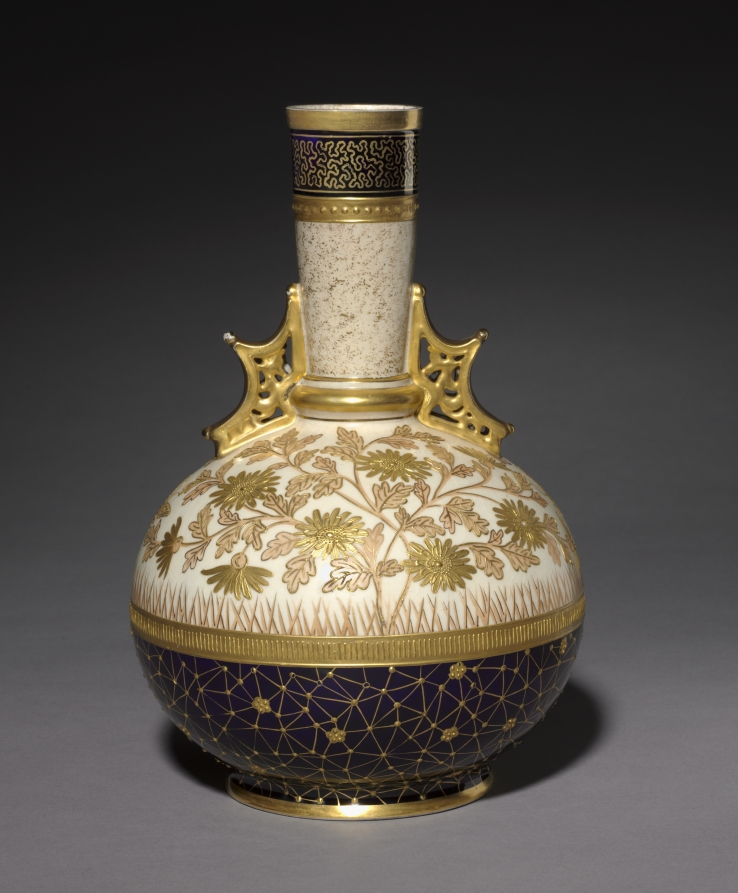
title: Vase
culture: America, New York, Brooklyn, 19th century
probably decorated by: Edward Lycett (American, 1833–1910)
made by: Faience Manufacturing Company (American)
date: c. 1884–1887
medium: earthenware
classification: Ceramic